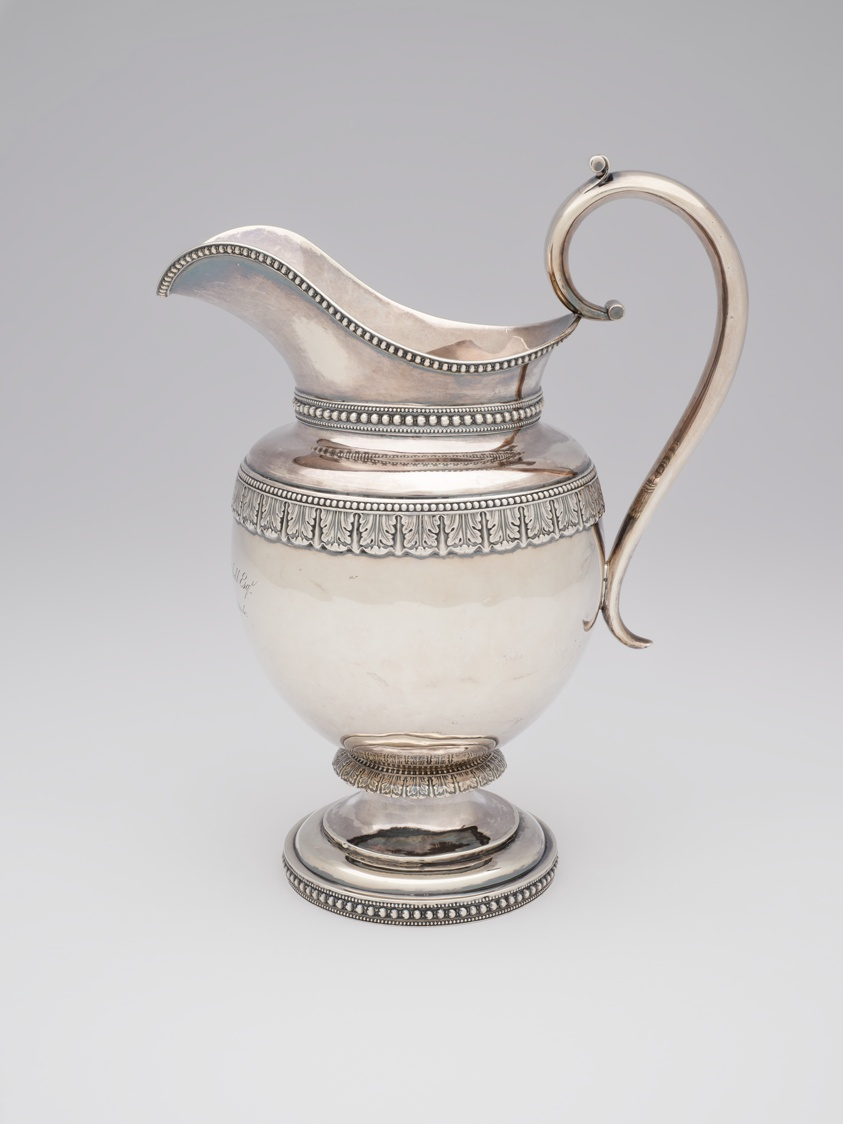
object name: Metalwork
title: Pitcher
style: 19th century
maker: Retailed by Baldwin Gardiner (American, 1791–1869); New York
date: 1827–48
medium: Silver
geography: New York City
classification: pitcher (vessel); silver; decorative arts